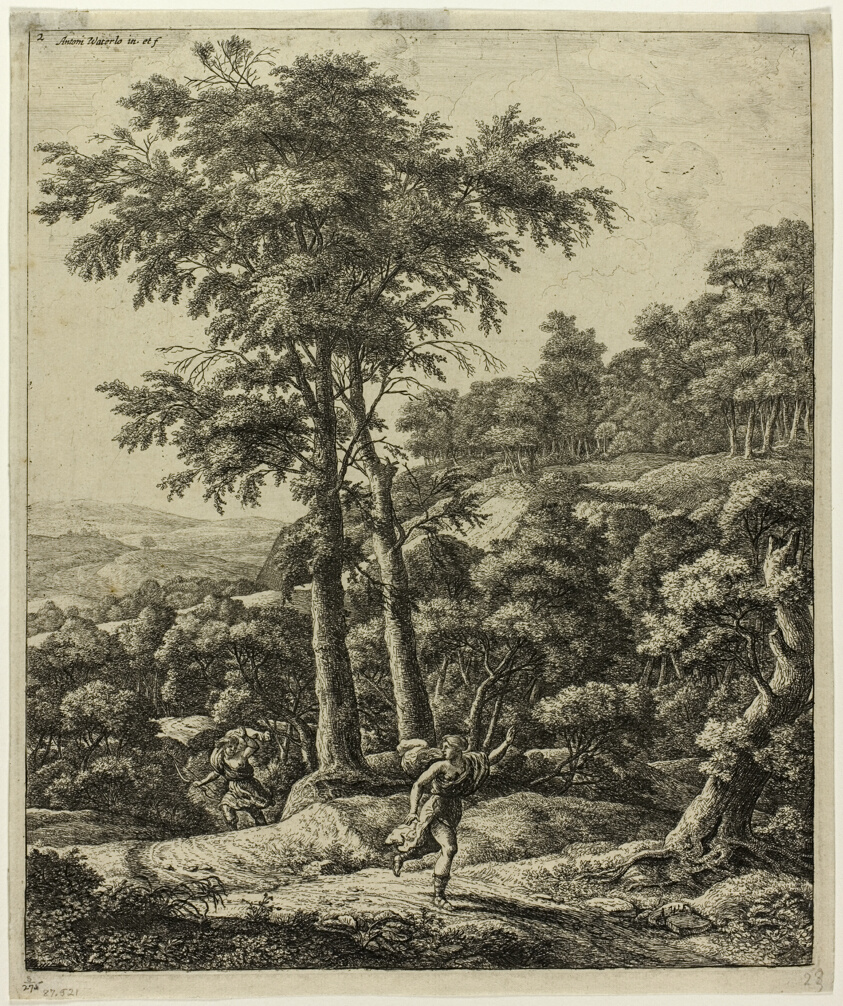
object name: Print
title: Apollo and Daphne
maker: Anthonie Waterloo (Dutch, c. 1610-1690)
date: 1640-90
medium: Etching on paper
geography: Holland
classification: etching; print; prints and drawing